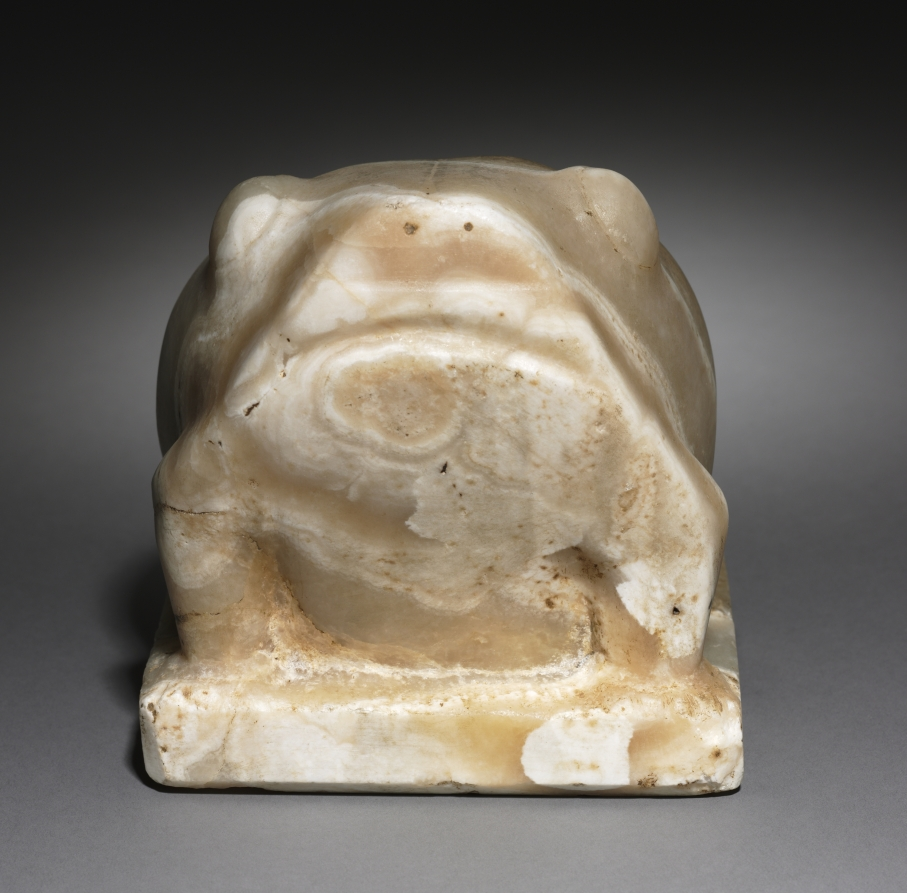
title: Statue of Heqat, the Frog Goddess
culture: Egypt, Predynastic (5000–2950 BCE), Naqada III (3200–3000 BCE)–Egypt, Early Dynastic (2950–2647 BCE), Dynasty 1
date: c. 2950 BCE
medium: travertine (Egyptian alabaster)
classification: Sculpture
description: During the Predynastic period statues of animals are much more common than those of humans. This statue of a frog stands at the beginning of a great tradition of animal sculpture in Egyptian art. The sculptor has shown great sensitivity to the natural banding of the stone, using it to enhance the roundness of the animal's form. Small frogs, mostly of faience, are among the most common votive offerings deposited at early temple sites. The frog's exact religious significance in the Predynastic period is unknown, but in later times it was most often identified with Heqat, the goddess who assisted at childbirth.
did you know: This probably represents a puffed-up Bufo viridis, one of two types of "frogs" (it is actually a toad) represented in Egyptian art.